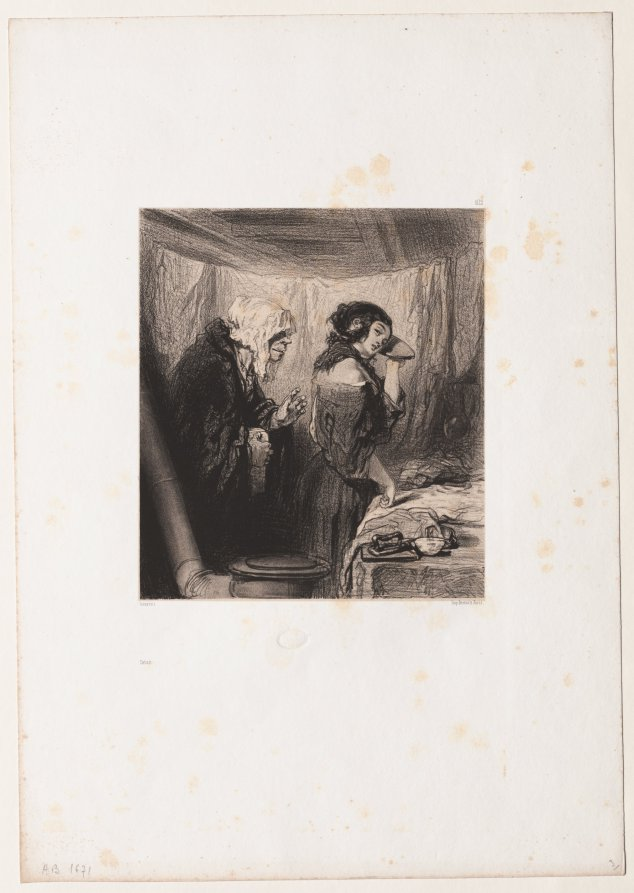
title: Satan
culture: France, 19th century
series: Ancient and Modern Artists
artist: Paul Gavarni (French, 1804–1866)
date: c.1848–62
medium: lithograph on chine collé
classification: Print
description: As the illustrated press proliferated in France during the 1800s, the caricatures published within such newspapers and magazines were sometimes censored. Paul Gavarni was one of numerous artists at this time who used imagery of laundresses as a means of social critique. Here, a young woman’s blouse falls from her shoulder, suggesting her loose morals. She pauses from ironing to listen as a procuress—a woman who lures girls into sex work—approaches her. The print’s title alludes to the woman’s motives and the precariousness of virtue. Gavarni was among Edgar Degas’s favorite artists, and Degas built a substantial collection of the earlier artist’s prints.